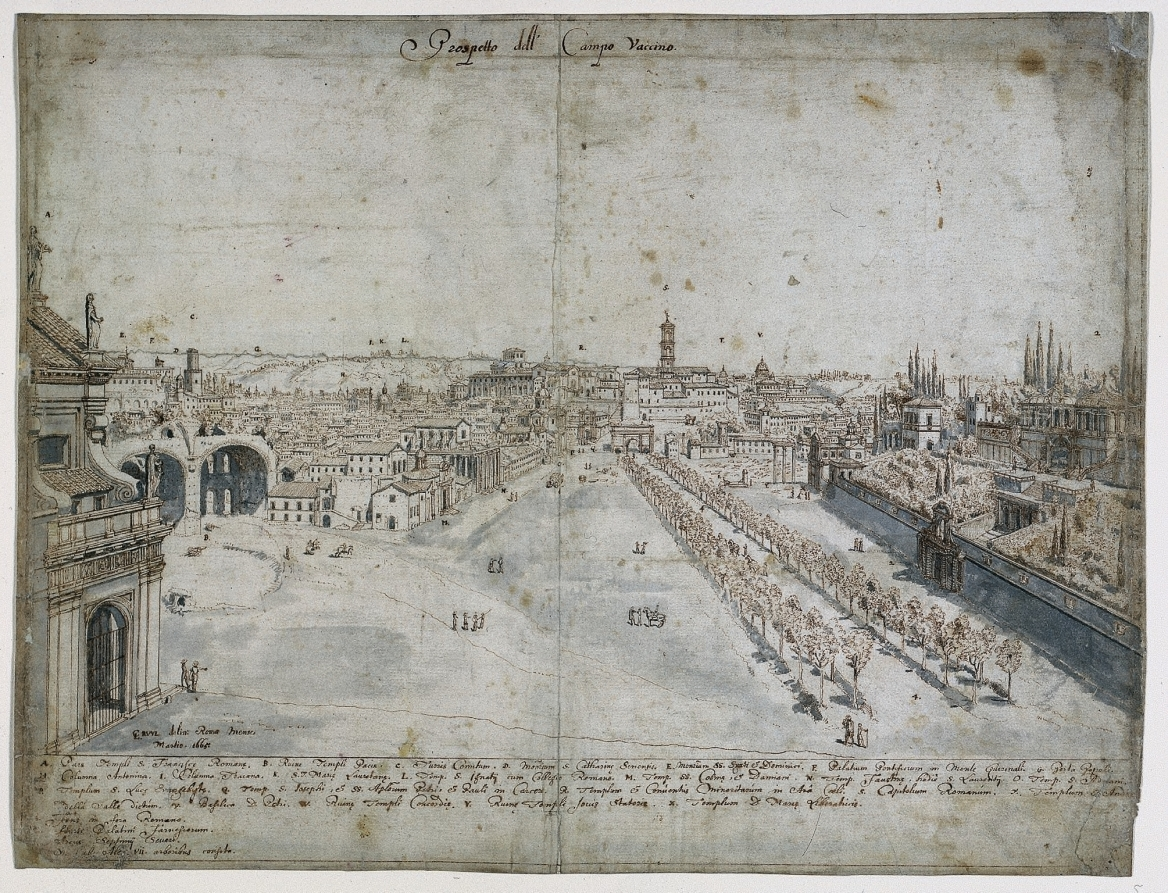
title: Eighteen Views of Rome: The Campo Vaccino (The Roman Forum)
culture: Flanders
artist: Lievin Cruyl (Flemish, c. 1640-c. 1720)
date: 1665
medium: pen and brown ink and brush and gray wash over stylus and graphite; framing lines in brown ink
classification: Drawing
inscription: signed, lower right, in brown ink: [artist's monogram: LC] RVYL delin: Romæ mense / Martio. 1665. ; by artist, upper center, in brown ink: Prospetto dell' Campo Vaccino. ; by artist, throughout composition, in brown ink: [the letters A-Y and the numerals 1-4] ; by artist, across bottom, in brown ink: A. Pars Templi S. Francescæ Romanæ. B. Ruinæ Templi Pacis. C. Turris Comitum. D. Montorium S. Catharinæ Senensis. E. Monrium SS. Syxti et Dominici. F. Palatium Pontificium in Monte Quirinale. G. Porta Populi. / H. Columna Antonina. I. Columna Traiana. K. S.T. Mariæ Laurentanæ. L. Temp. S. Ignatij cum Collegio Romano. M. Temp. SS. Cosmæ, et Damiani. N. Temp. Fautinæ, hodiè S. Laurentij. O. Temp. Adreani. / P. Templum S. Lucæ Evangelistæ. Q. Temp. S. Iosephi, et SS. Aplorum Petri, et Pauli in Carcere. R.Templum et Conventus Minoritarum in Arâ Coeli. S. Capitolium Romanum. T. Templum S. Andr[ea] / della Valle dictum. U. Basilica S. Petri. W. Ruinæ Templi Concordiæ. V. Ruinæ Templi Jovis Statoris. X. Templum D. Mariæ Liberatoris. / [1]. Fons in Foro Romano. / 2. Horti in Palatini Farnesiorum. / 3. Arcus Septimij Severi. / [4.] V[ia] ab Alex. vii. arboribus consita. ; ON STRIPS OF PAPER MOUNTED TO VERSO, lower center, in graphite: A20967 ; lower right, in graphite: E. 17 ; ON PIECE OF PAPER APPLIED TO VERSO AS A REPAIR, center, in graphite: [two lines of illegible inscription] [masked]